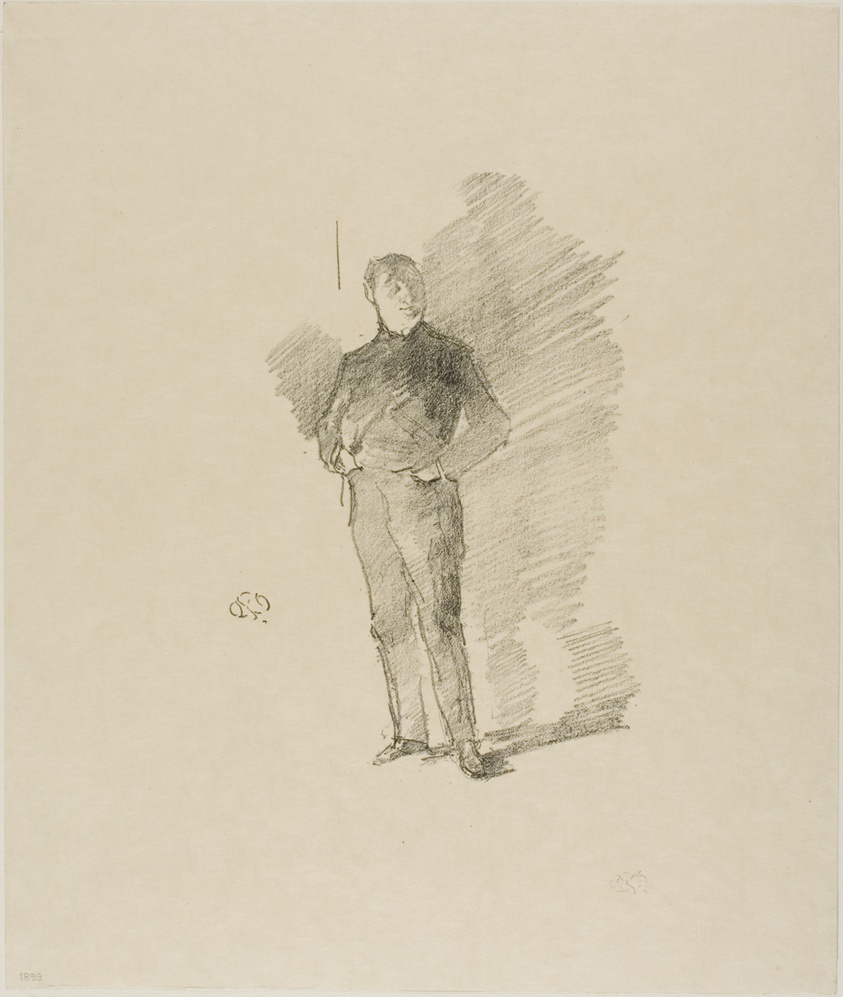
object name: Print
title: Study No. 2: Mr. Thomas Way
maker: James McNeill Whistler (American, 1834-1903)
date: 1896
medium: Transfer lithograph in black on cream wove Japanese vellum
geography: United States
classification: transfer lithograph; lithograph; print; prints and drawing